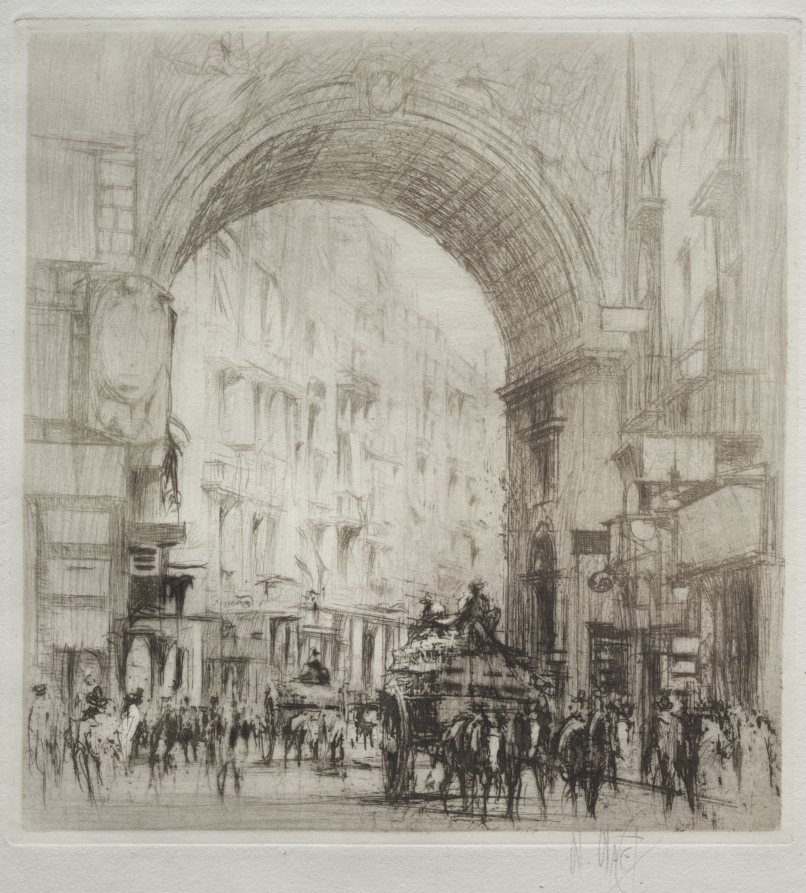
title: Arco San Carlo, Naples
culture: England, 20th century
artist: William Walcot (British, 1874–1943)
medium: etching and drypoint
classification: Print